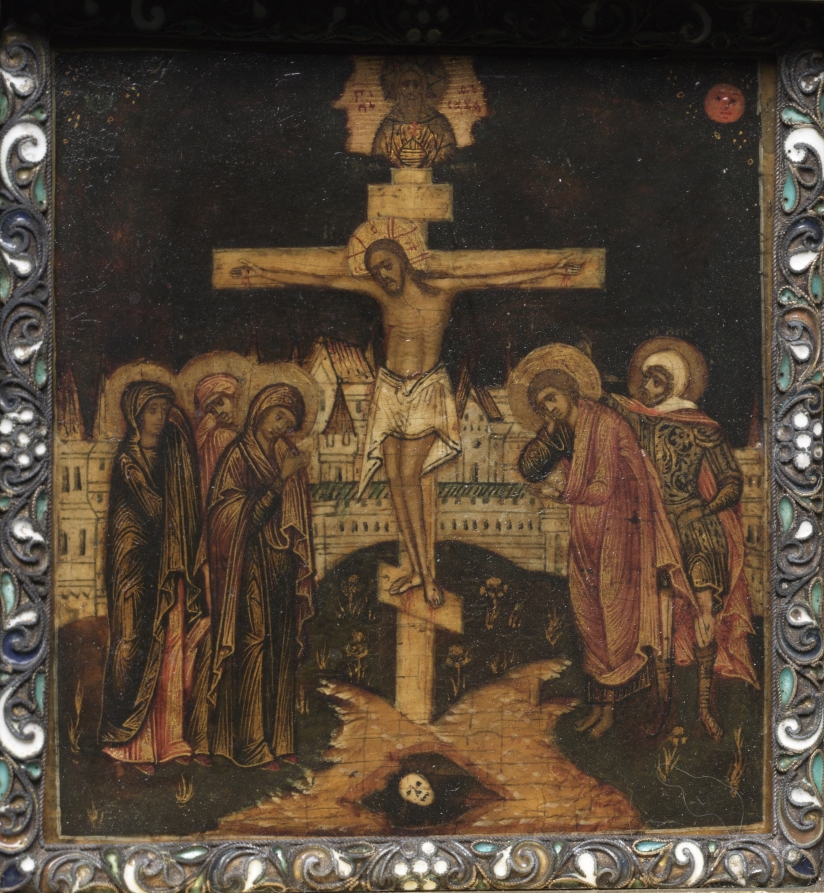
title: Portable Triptych Icon: The Crucifixion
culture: Byzantium. Russia, Moscow?, Byzantine period, 17th century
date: 1600s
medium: painted wood panel within enameled brass frame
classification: Painting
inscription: Inscribed throughout in traditional Church Russian (Church Slavonic) with names of prophets, saints, etc. Engraved on the outside of the brass frame is a cross with the symbols of the Passion, inscribed (top to bottom): The King of Glory; Jesus Christ; Victor; Lance (with which Christ was speared); Stick (tipped with acid to aggravate the wound); the initials R, B, M, L, G, G, standing for various personages represented in the paintings; and at the lower center, the Russian letters GA ("Golova Adama": Head of Adam). A scrap of paper was found behind the center panel, but it is damaged and very difficult to read. Professor A. Dean McKenzie of the University of Oregon, who translated the numerous inscriptions and identified the iconography of the panels, likewise examined the writing on the paper scrap and in a letter of January 29, 1979, said that it refers to two brothers: Ivan Dmitrievich, one of the brothers, apparently presented this icon as a gift to his younger brother.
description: This triptych icon was probably commissioned by a lay person for private prayer and meditation. It could be folded and shut when not in use. The scenes represented from left to right are: The Crucifixion (left); The Resurrection and Anastasis (center); and Adoration of the Miracle-Working Icon of the Vladimir Mother of God (right). Small portable icons such as this were common to later Russian religious practice.